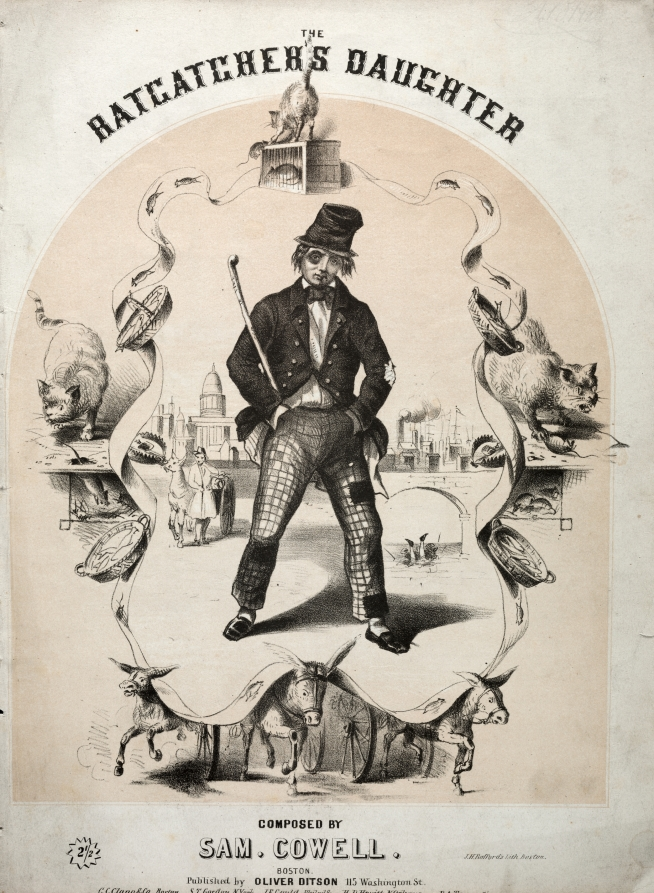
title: The Ratcatcher's Daughter - Sheet Music Cover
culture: America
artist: Winslow Homer (American, 1836–1910)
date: c. 1855–70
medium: lithograph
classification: Print